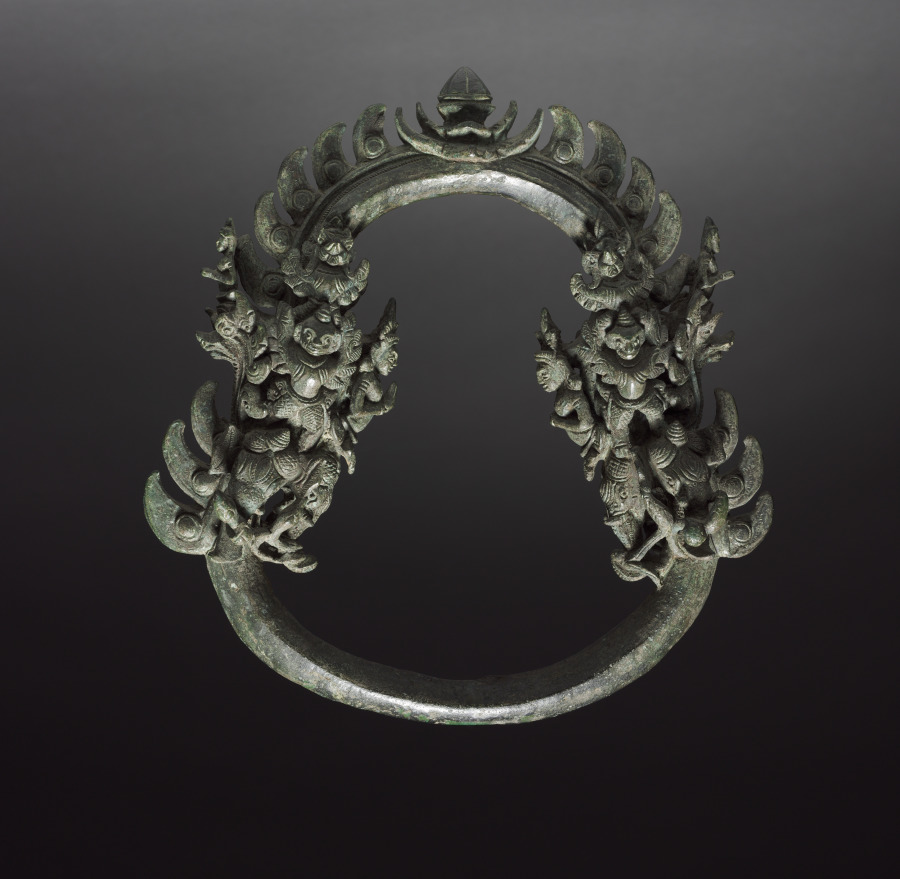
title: Palanquin Ring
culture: Cambodia, probably Angkor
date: 1100s–1200s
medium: bronze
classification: Sculpture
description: When members of the royal family or priesthood traveled in a public festival procession to make offerings at a temple or participate in a ceremony, they would be carried in a palanquin, or a covered litter. Portable objects of veneration, such as bronze images or a sacred fire, were also carried on palanquins. The palanquins had wooden poles, hanging seats or raised platforms, and bronze fittings cast in intricate forms and gilt, lending the palanquins a sumptuous quality. This ring, which supported a suspended seat, would have hung on a hook attached to a wooden pole. The body of the ring is shaped in the form of a pair of nagas, or serpents. The flanges, or protrusions, on the top and sides are stylized spines of the serpent’s body, and the heads rear up on either side. In a richly textured cluster of separately cast figures on both sides of the ring are images of composite bird-human, monkey-human, and elephant forms.